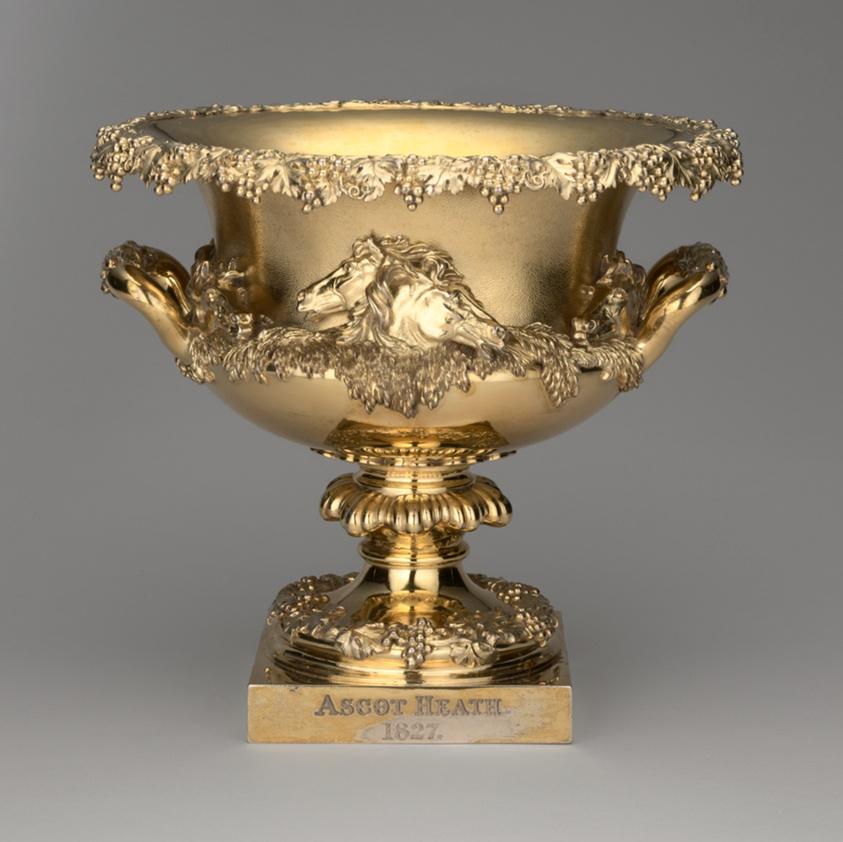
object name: Metalwork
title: Ascot Cup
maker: England, London; Paul Storr (English, 1771–1844)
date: 1825/26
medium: Silver gilt with cast, applied, and chased decoration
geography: London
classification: drinking vessel; silver; metalwork; european decorative arts